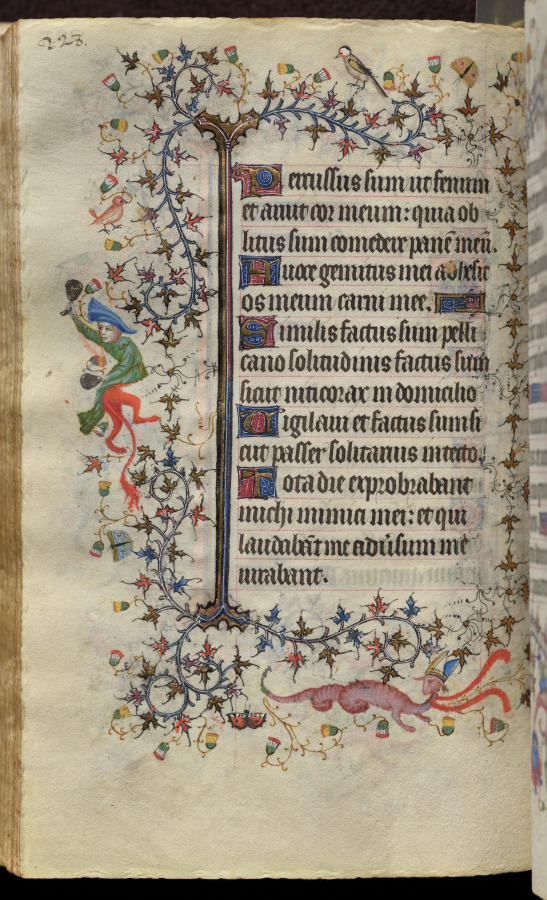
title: Hours of Charles the Noble, King of Navarre (1361-1425): fol. 114v, Text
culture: France, Paris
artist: Master of the Brussels Initials and Associates (French)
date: c. 1405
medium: ink, tempera, and gold on vellum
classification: Bound Volume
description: This precious volume was obviously highly prized by its owner, the French-born King of Navarre, who had his coat of arms painted on no less than twenty folios. Rather than directly commissioning this manuscript from a specific workshop, it seems that Charles the Noble acquired his book of hours -- perhaps ready-made for the luxury market -- while on a trip to Paris in 1404-05. A collaborative effort, six painting styles are evidenced within the pages of this codex, those of two Italians, two Frenchmen, and two Netherlanders. The painter who was responsible for the planning and decoration of the book, and who produced seventeen of the large miniatures, was a Bolognese artist known as the Master of the Brussels Initials. His principal assistant, responsible for most of the borders, was a Florentine who signed his name "Zecho" da Firenze on folio 208 verso.